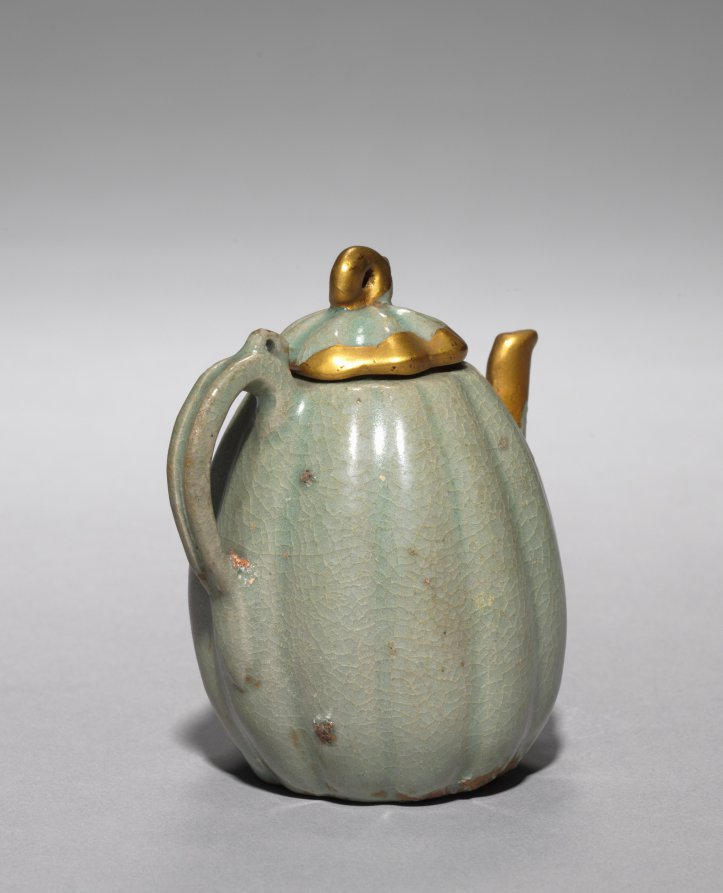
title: Melon-shaped Wine Ewer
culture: Korea, Goryeo dynasty (918–1392)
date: 1100s-1200s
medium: celadon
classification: Ceramic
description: Many celadon ceramics, such as these two miniature pots, have been repaired with gold lacquer. Termed kintsugi (literally meaning “gold joinery”) in Japanese, this restoration method highlights broken parts with glittering gold mixed with lacquer. Initiated in Japan in the 1400s, the technique follows a popular aesthetic concept called wabi-sabi, which finds beauty in imperfect things. Goryeo celadons were considered rare treasures among Japanese collectors in the early 1900s; thus, their broken condition is brilliantly highlighted in gold lacquer, as seen here in the repaired spouts, handle, and lid.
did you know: This miniature wine pot was buried in a tomb for the soul of the deceased.